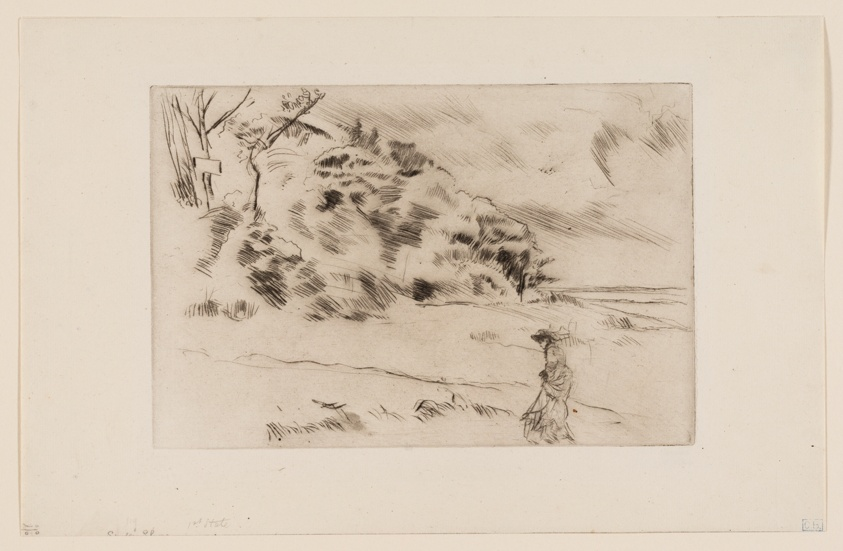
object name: Print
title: Speke Shore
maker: James McNeill Whistler (American, 1834-1903)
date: 1875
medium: Drypoint in black ink on off-white laid paper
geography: United States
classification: drypoint; print; prints and drawing; paper